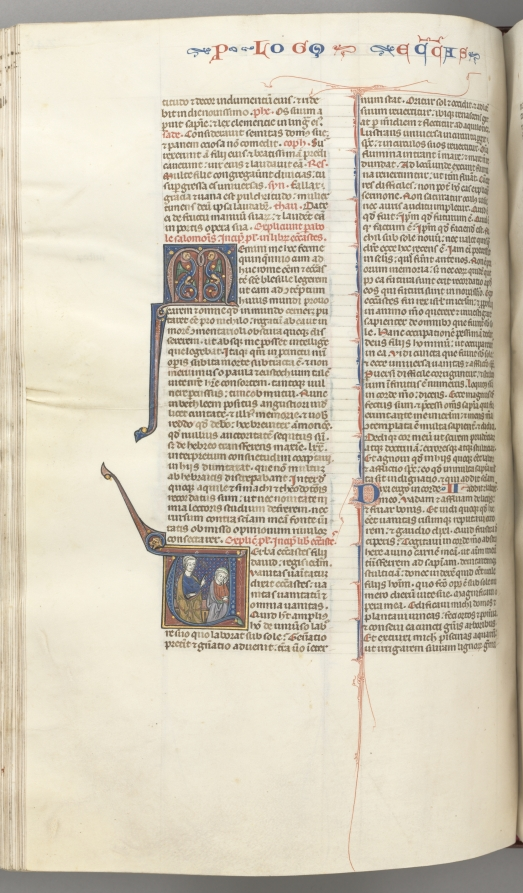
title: Fol. 247v, Ecclesiastes, historiated initial V, Solomon teaching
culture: Southern France, Toulouse(?), 13th century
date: c. 1275–1300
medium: ink, tempera and gold on vellum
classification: Bound Volume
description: Biblical manuscripts were highly prized and important possessions of churches, monasteries, cathedral schools, and universities throughout medieval Europe. The biblical texts were known as the vulgate, the translations made by Saint Jerome in the fourth century from Hebrew and Greek into Latin, which became the definitive and official Latin version of the Roman Church. In the 13th century, the bible was, for the first time, produced as a single volume with an officially sanctioned sequence to its books and chapters as illustrated by this example. The very extensive decoration of this bible is arranged hierarchically to indicate the relative importance of the various texts so that full or almost full-page initials mark the openings of the first prologue, Genesis, and the first Gospel; historiated initials mark the beginning of each book and illuminated initials mark the Prologues.